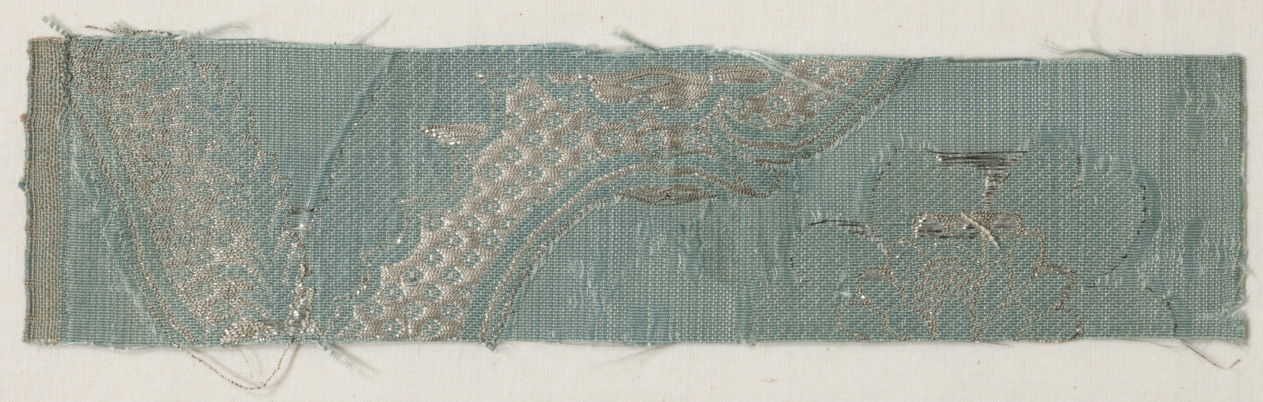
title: Length of Textile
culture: France, 18th century, Period of Louis XV (1723-1774)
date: 1723–1774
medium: plain compound cloth, brocaded; silk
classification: Textile